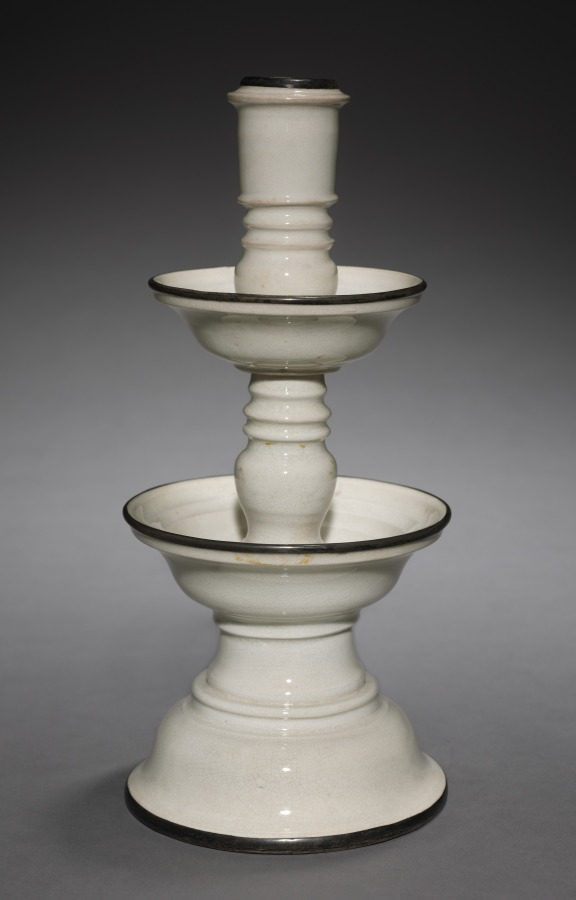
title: Candlestick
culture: China, Ming dynasty (1368–1644)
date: 1600s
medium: glazed porcelain with metal rims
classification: Ceramic